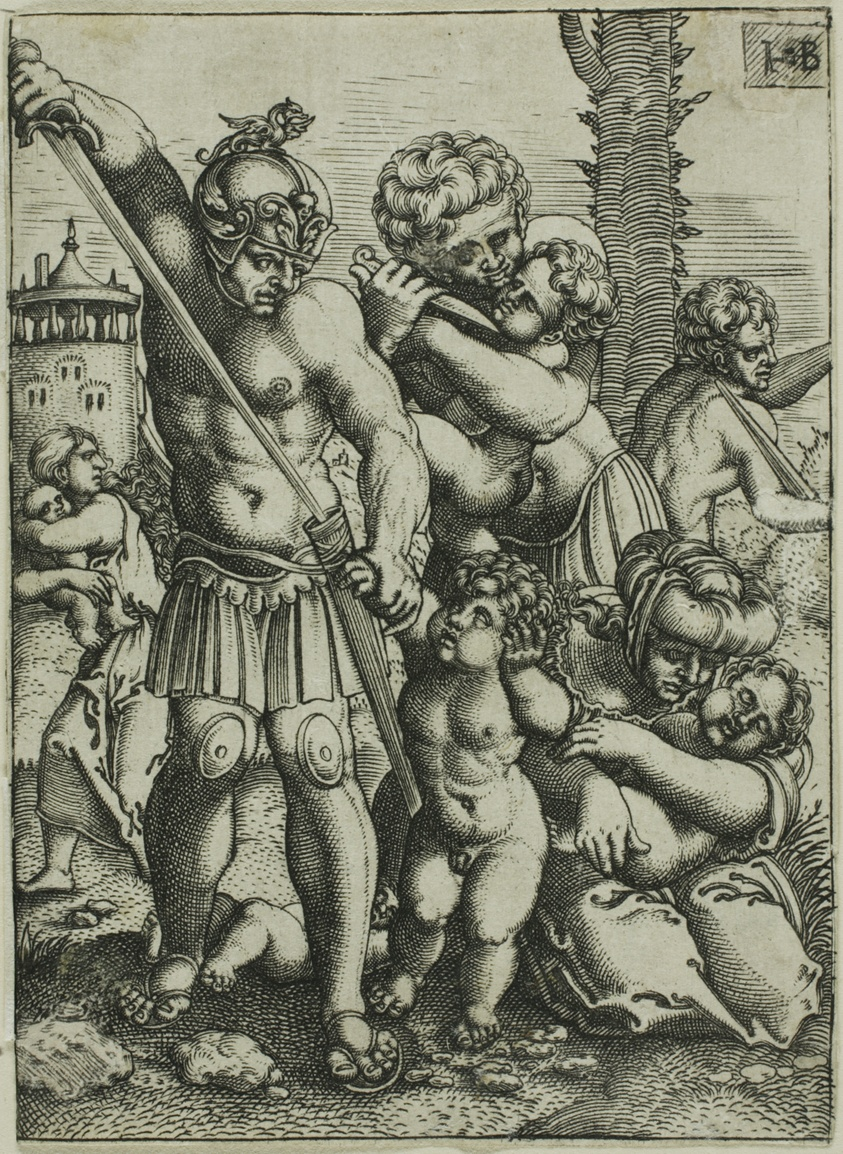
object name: Print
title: The Massacre of the Innocents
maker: Jacob Binck (German, c. 1500-1569)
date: 1520/69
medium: Engraving in black on ivory laid paper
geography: Germany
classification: engraving; print; prints and drawing